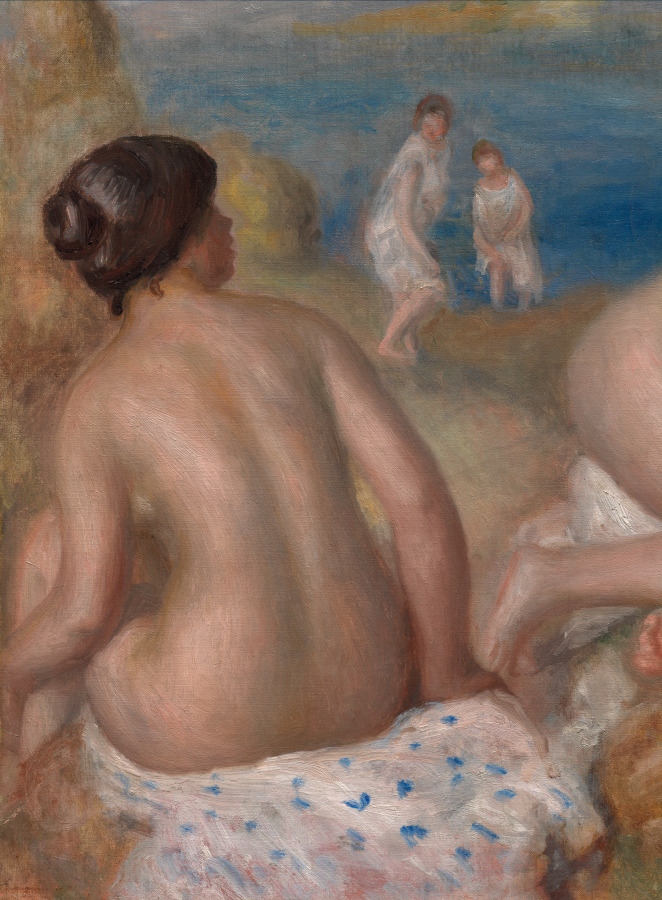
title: Bathers Playing with a Crab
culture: France, 19th century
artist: Pierre-Auguste Renoir (French, 1841–1919)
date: c. 1897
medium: oil on fabric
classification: Painting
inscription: Signed lower right: Renoir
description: After viewing Renaissance paintings on a trip to Italy in 1881, Renoir attempted to bring greater order and stability to Impressionism by merging flickering light effects with solid forms. He conveyed this new ambition in a series of paintings of nude bathers, a subject that preoccupied him from 1883 until his death in 1919. Avant-garde artists of the 20th century admired his ability to blend modernist and classicizing tendencies.